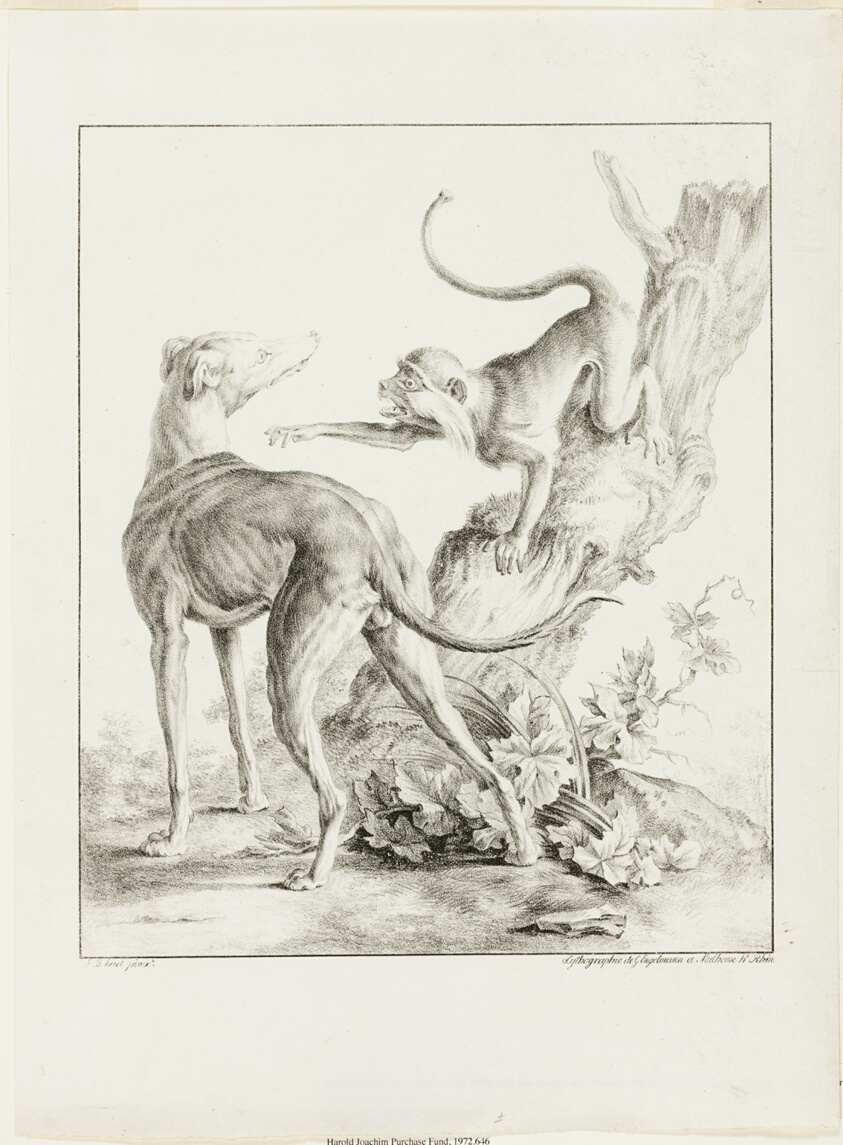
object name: Print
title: Dog and Monkey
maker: Gottfried Engelmann (French, 1788-1839); after Jean Baptiste Huet (French, 1745-1811); or after Jean-Baptist Huet, the younger (French, 1772-19th century)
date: 1814/15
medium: Lithograph in black on ivory wove paper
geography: France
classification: lithograph; print; prints and drawing